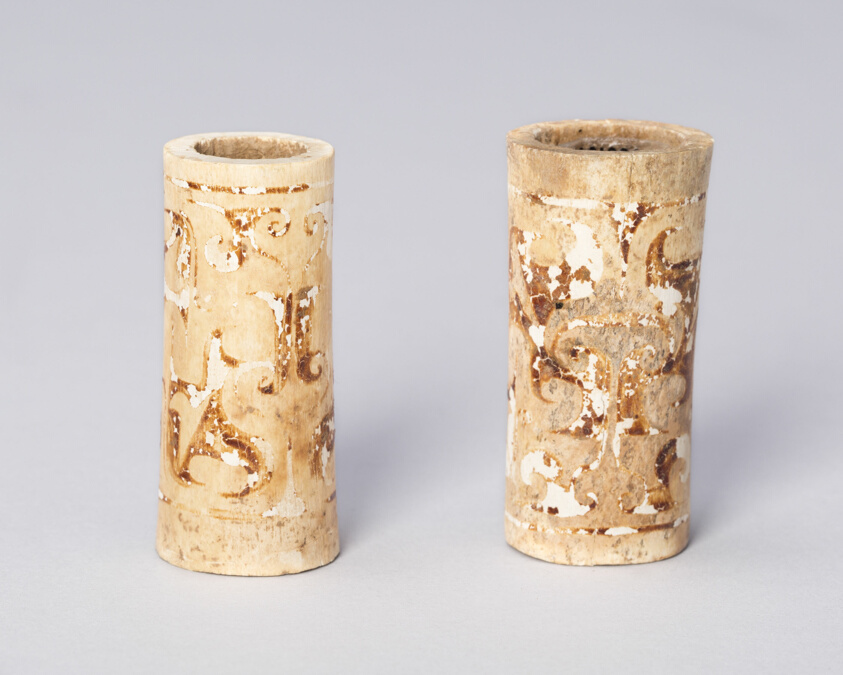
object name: Costume and Accessories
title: Pair of Tubular Beads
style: Chinese (culture or style)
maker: China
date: Eastern Zhou dynasty, Warring States (Zhanguo) period (480–221 B.C.)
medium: Bone with painted decoration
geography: China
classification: bone; decorative object/ornament; asian art; costume